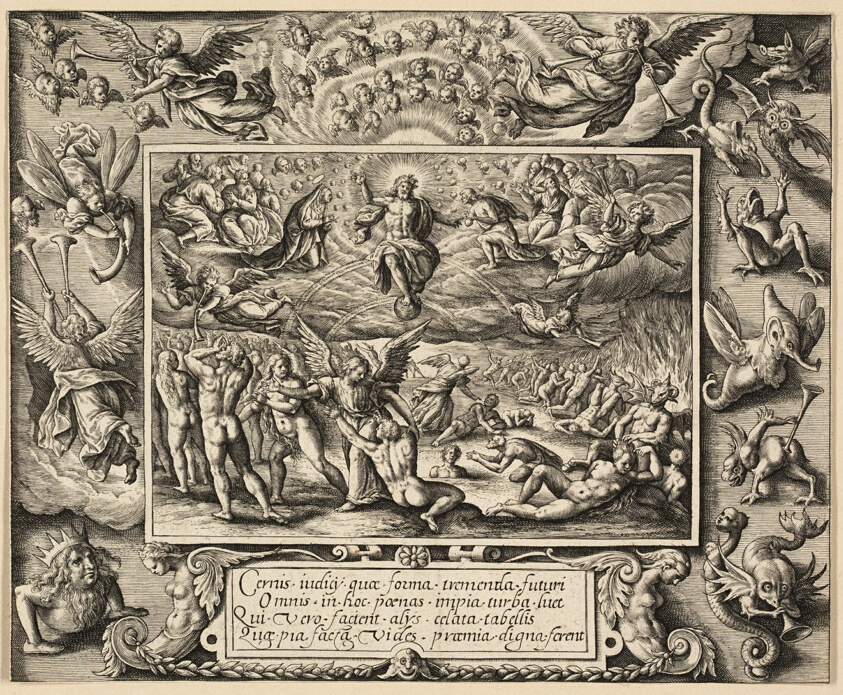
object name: Print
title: The Last Judgment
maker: Jerome Wierix; Flemish, 1553-1619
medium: Engraving in black on ivory laid paper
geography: Flanders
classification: engraving; print; prints and drawing